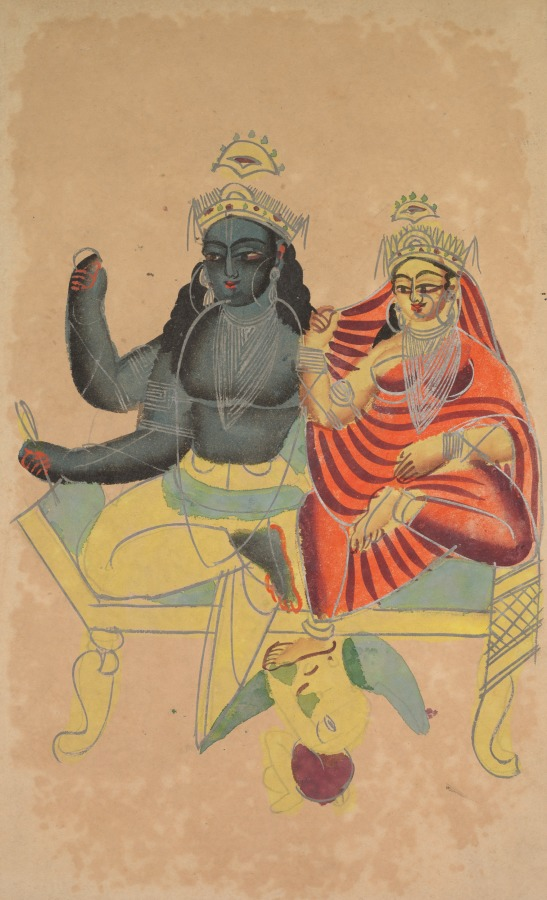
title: Vishnu and Lakshmi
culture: Eastern India, Bengal, Kolkata, Kalighat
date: c. 1890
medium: Gum tempera, graphite, ink, and tin on paper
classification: Painting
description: Vishnu in his four-armed form is depicted seated with his consort Lakshmi (Goddess of Wealth) while his vehicle, the eagle, kneels in front of him.